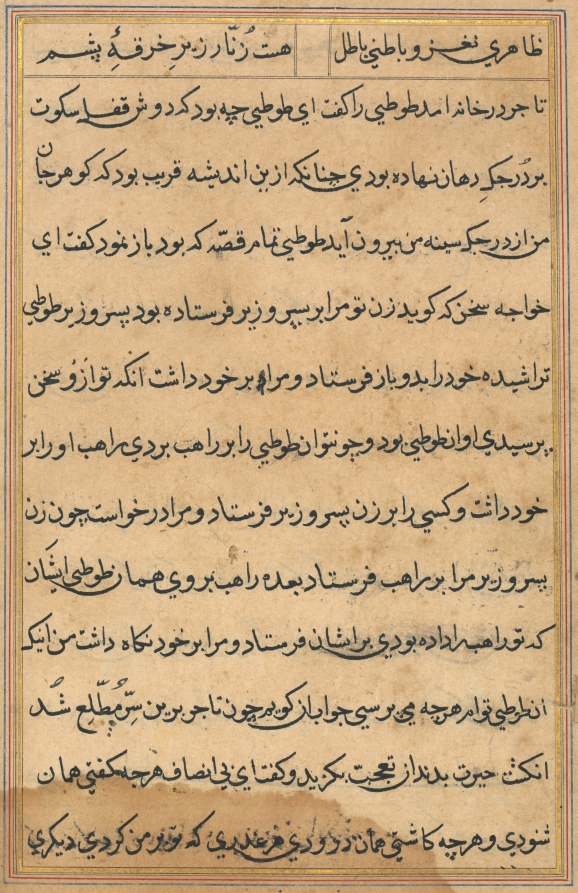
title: Page from Tales of a Parrot (Tuti-nama): text page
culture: Mughal India, court of Akbar (reigned 1556–1605)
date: c. 1560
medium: gum tempera, ink, and gold on paper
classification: Painting